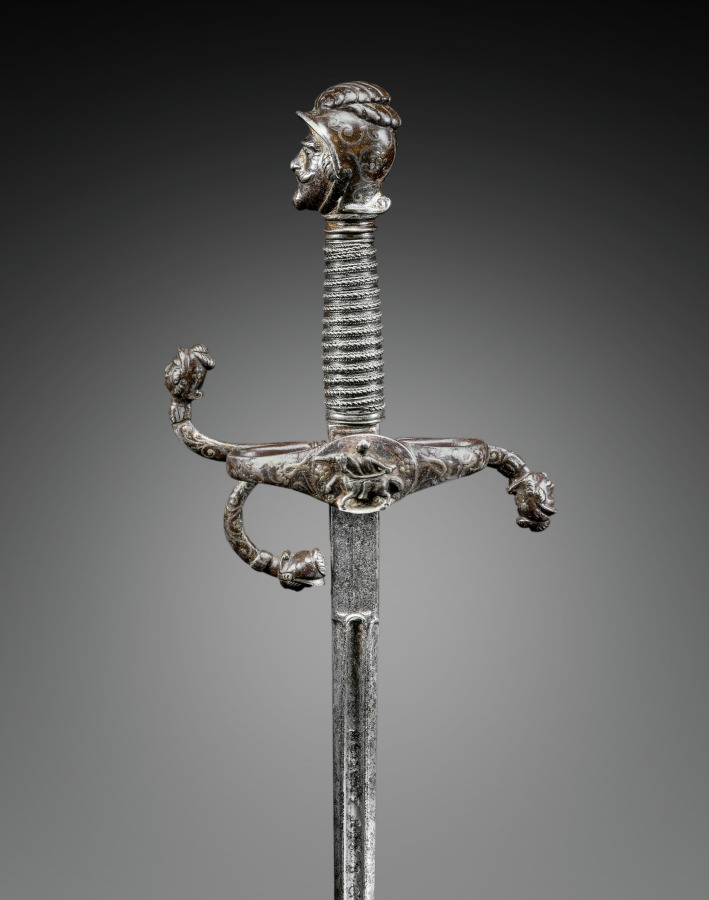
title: Rapier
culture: Germany, Solingen, early 17th Century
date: c. 1600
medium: Russeted and gilded steel with inlaid silver, pommel and quillons termini chiseled in form of warrior heads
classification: Arms and Armor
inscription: PETTHERR / WIRSBERGH